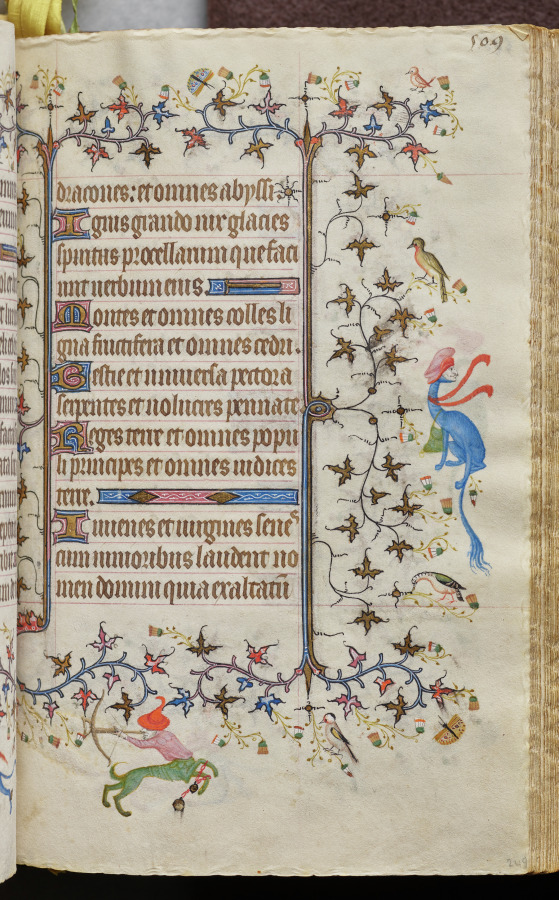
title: Hours of Charles the Noble, King of Navarre (1361-1425): fol. 249r, Text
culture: France, Paris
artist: Master of the Brussels Initials and Associates (French)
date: c. 1405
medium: ink, tempera, and gold on vellum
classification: Bound Volume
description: This precious volume was obviously highly prized by its owner, the French-born King of Navarre, who had his coat of arms painted on no less than twenty folios. Rather than directly commissioning this manuscript from a specific workshop, it seems that Charles the Noble acquired his book of hours -- perhaps ready-made for the luxury market -- while on a trip to Paris in 1404-05. A collaborative effort, six painting styles are evidenced within the pages of this codex, those of two Italians, two Frenchmen, and two Netherlanders. The painter who was responsible for the planning and decoration of the book, and who produced seventeen of the large miniatures, was a Bolognese artist known as the Master of the Brussels Initials. His principal assistant, responsible for most of the borders, was a Florentine who signed his name "Zecho" da Firenze on folio 208 verso.